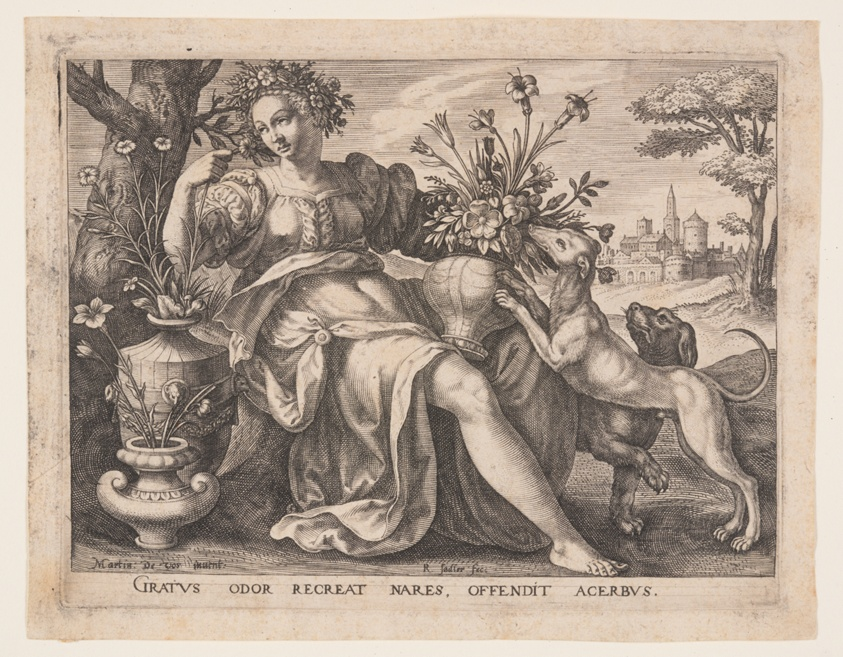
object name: Print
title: Smell, from The Five Senses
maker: Raphael Sadeler I (Flemish, 1560/61–1628/32); after Maarten de Vos (Flemish, 1532–1603)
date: 1581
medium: Engraving on paper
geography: Flanders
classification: engraving; paper; print; prints and drawing